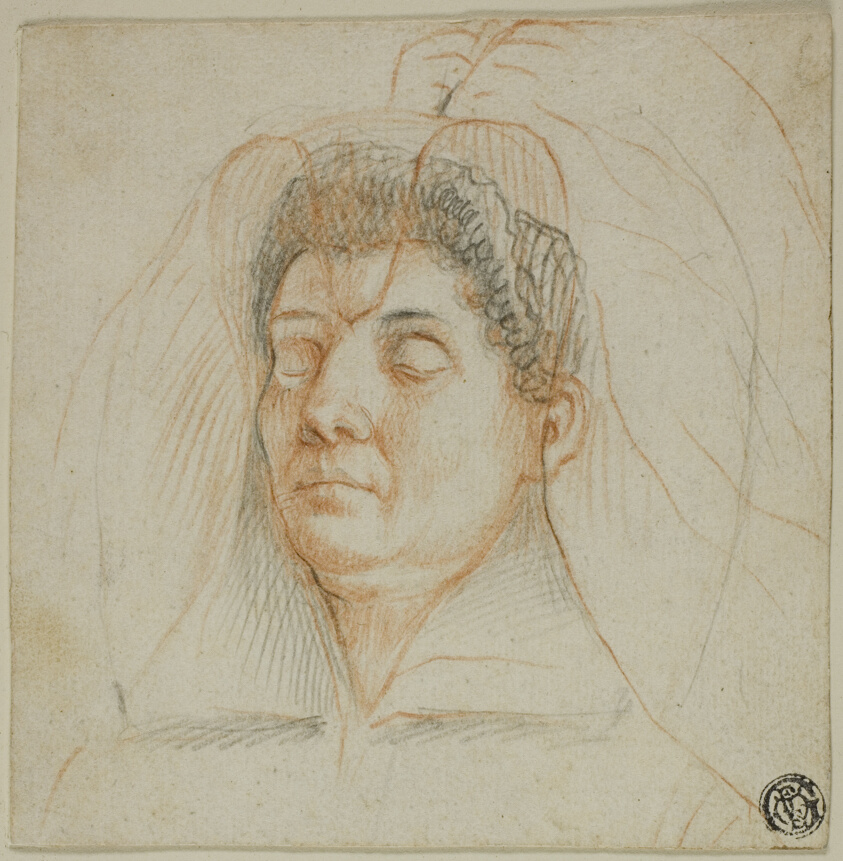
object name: Drawing and Watercolor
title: Death Mask of a Woman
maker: Circle of Lavinia Fontana (Italian, 1552-1614)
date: c. 1605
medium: Black and red chalk, on ivory laid paper, laid down on ivory wove paper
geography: Italy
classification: chalk; drawings (visual works); prints and drawing